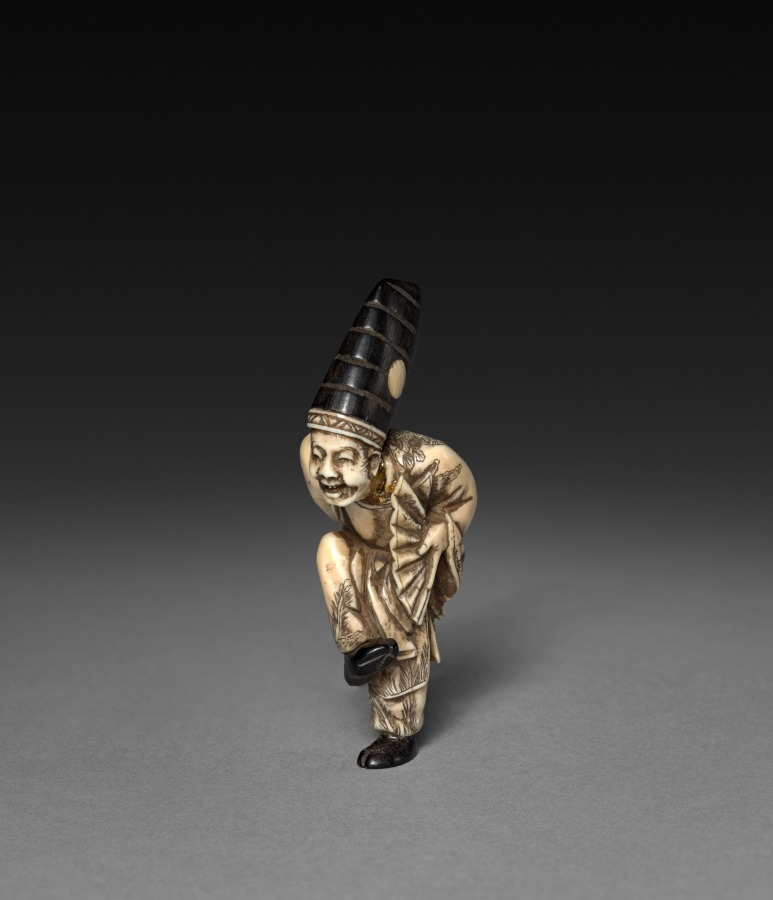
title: Dancing Man with Fan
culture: Japan, Edo period (1615–1868)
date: early to mid-1800s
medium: ivory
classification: Netsuke